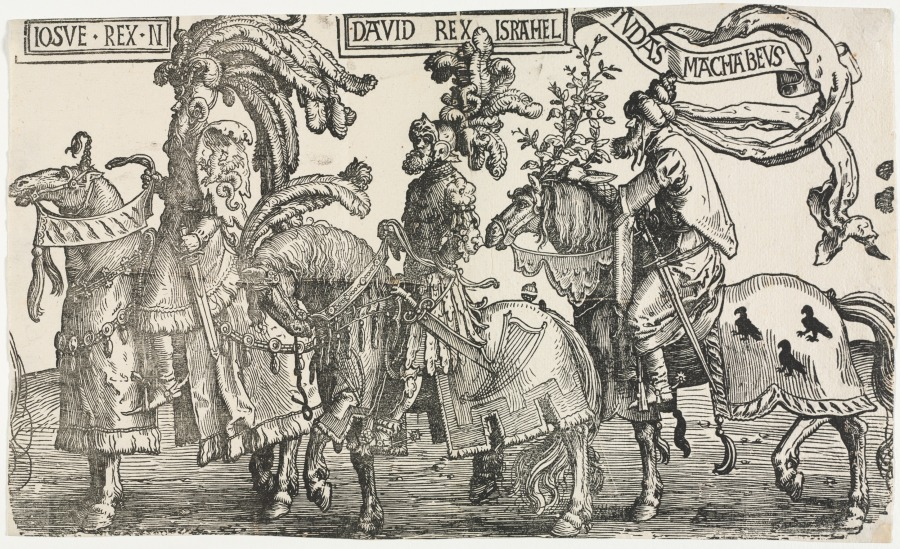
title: The Nine Heroes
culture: Netherlands, 16th century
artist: Lucas van Leyden (Netherlandish, 1494–about 1533)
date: 1515–1517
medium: woodcut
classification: Print